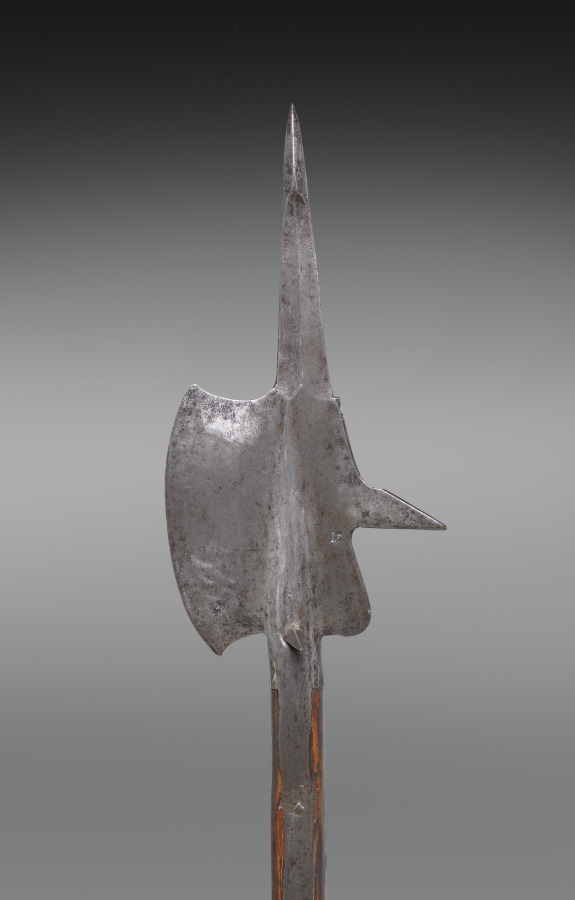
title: Halberd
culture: Switzerland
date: 1600s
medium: steel; new rectangular wood haft with planed corners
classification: Arms and Armor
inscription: IP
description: The halberd was a staff weapon favored by European infantries (foot soldiers) of the 1400s and 1500s for its versatility and deadly effect. The word halberd comes from the German words Halm (staff) and Barte (axe). The halberd is, in fact, an axe that served multiple functions: the axe blade was used for hacking, the spike for thrusting, and the beak for piercing plate armor or for pulling a knight from his saddle. The halberd was used by shock troops (those who lead an attack) and by Swiss and German mercenaries. After about 1550, the halberd gradually became less functional. Its large blade provided space for coats of arms and insignia. By the late 1500s, the parade halberd had become a ceremonial weapon for palace guards.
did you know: The earliest known mention of the halberd is believed to be by the Swiss poet Konrad von Würzburg (d. 1287) who wrote about them in his History of the Trojan War.